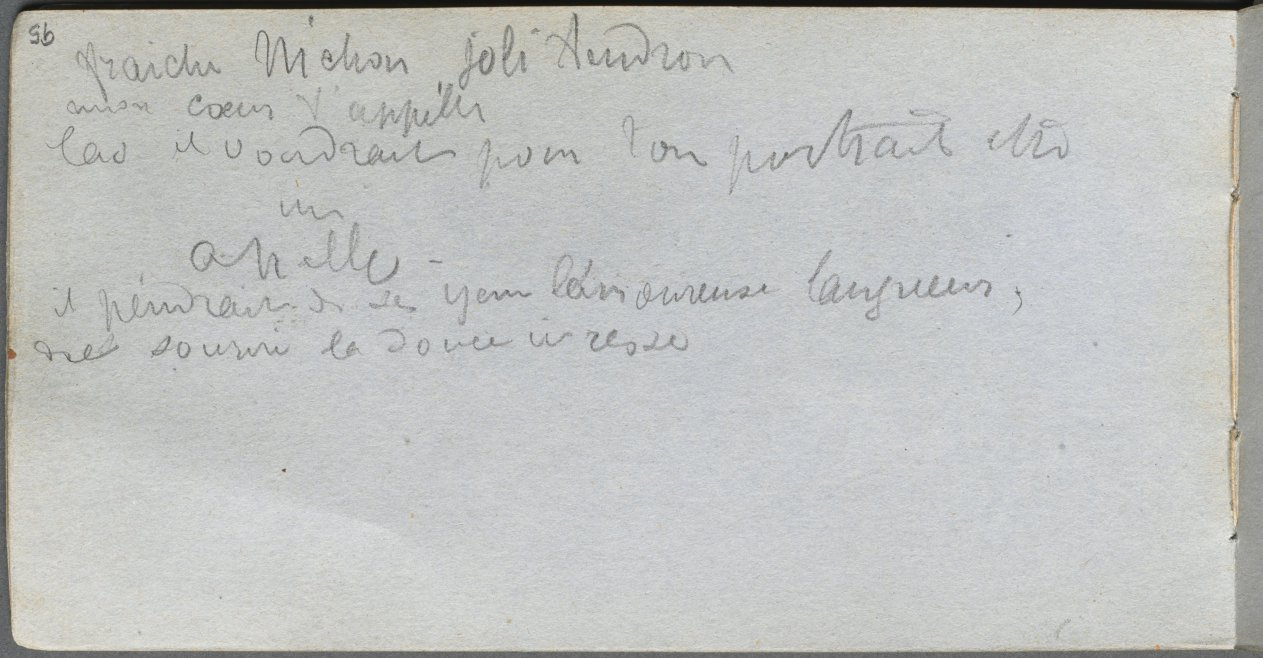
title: Sketchbook, page 95: Notes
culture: France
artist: Ernest Meissonier (French, 1815–1891)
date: c. 1860s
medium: graphite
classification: Bound Volume